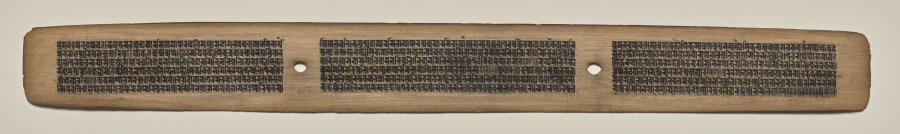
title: Text, Folio 74 (recto), from a Manuscript of the Perfection of Wisdom in Eight Thousand Lines (Ashtasahasrika Prajnaparamita-sutra)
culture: Eastern India, Bihar, Vikramashila Monastery. Painting: Nepal, Kathmandu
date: Sunday, September 14, 1119 (year 239 of the Newar Samvat in the month of Ashvina)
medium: gum tempera and ink on palm leaves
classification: Painting